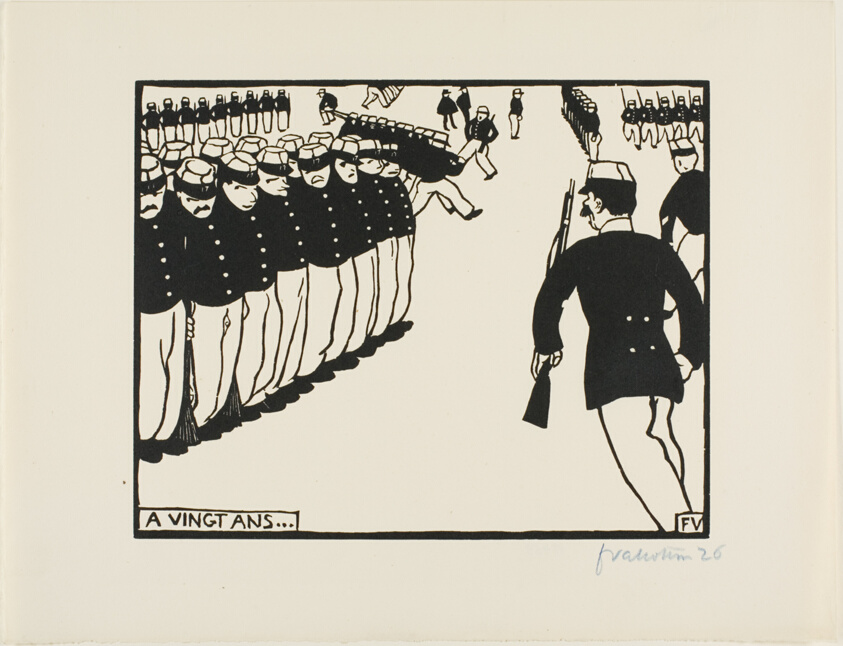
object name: Print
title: At the Age of Twenty...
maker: Félix Edouard Vallotton (French, born Switzerland, 1865-1925)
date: 1894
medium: Woodcut in black on cream wove paper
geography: France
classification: woodcut; print; prints and drawing